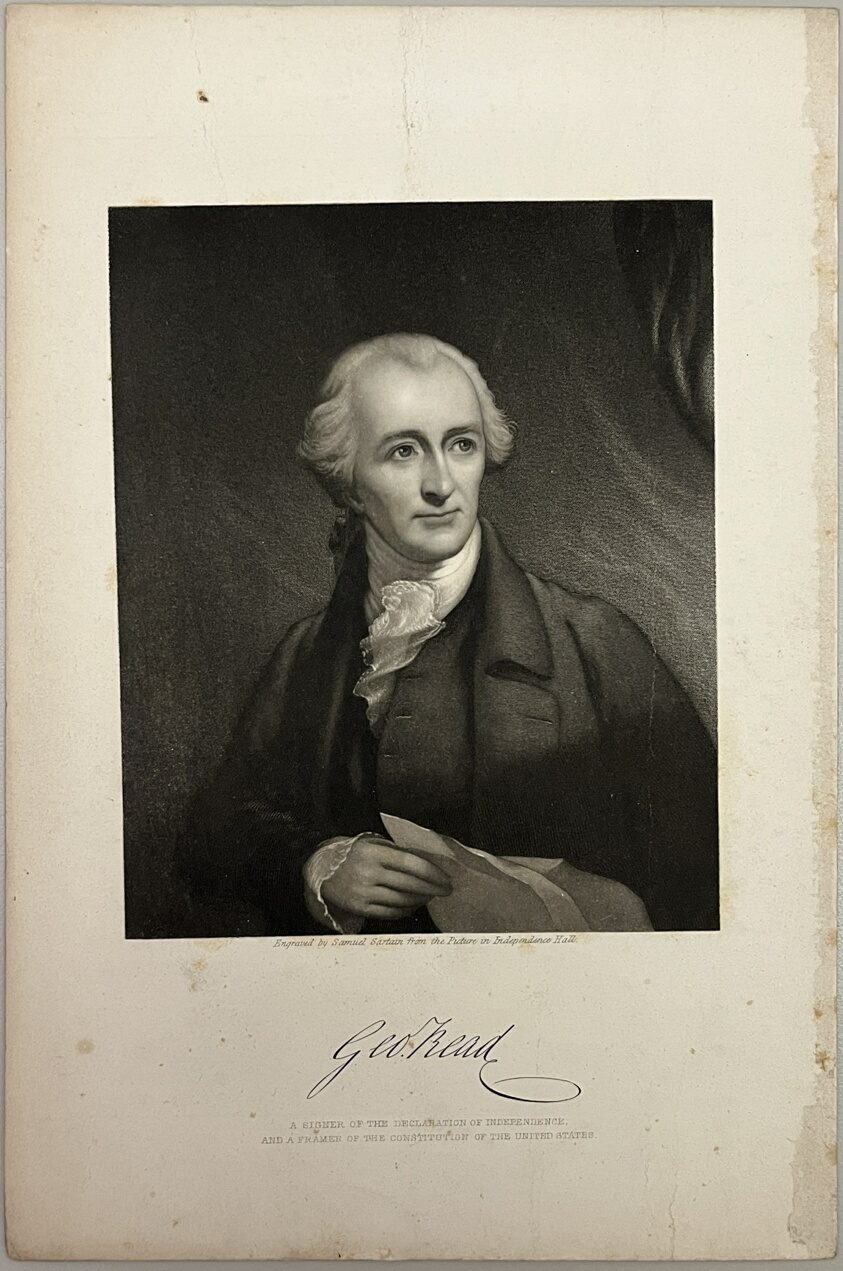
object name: Print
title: George Read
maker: Samuel Sartain (American, 1830-1906); likely after Robert Edge Pine (British, 1742-1788)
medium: Steel engraving and mezzotint on paper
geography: United States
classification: reproduction; print; prints and drawing